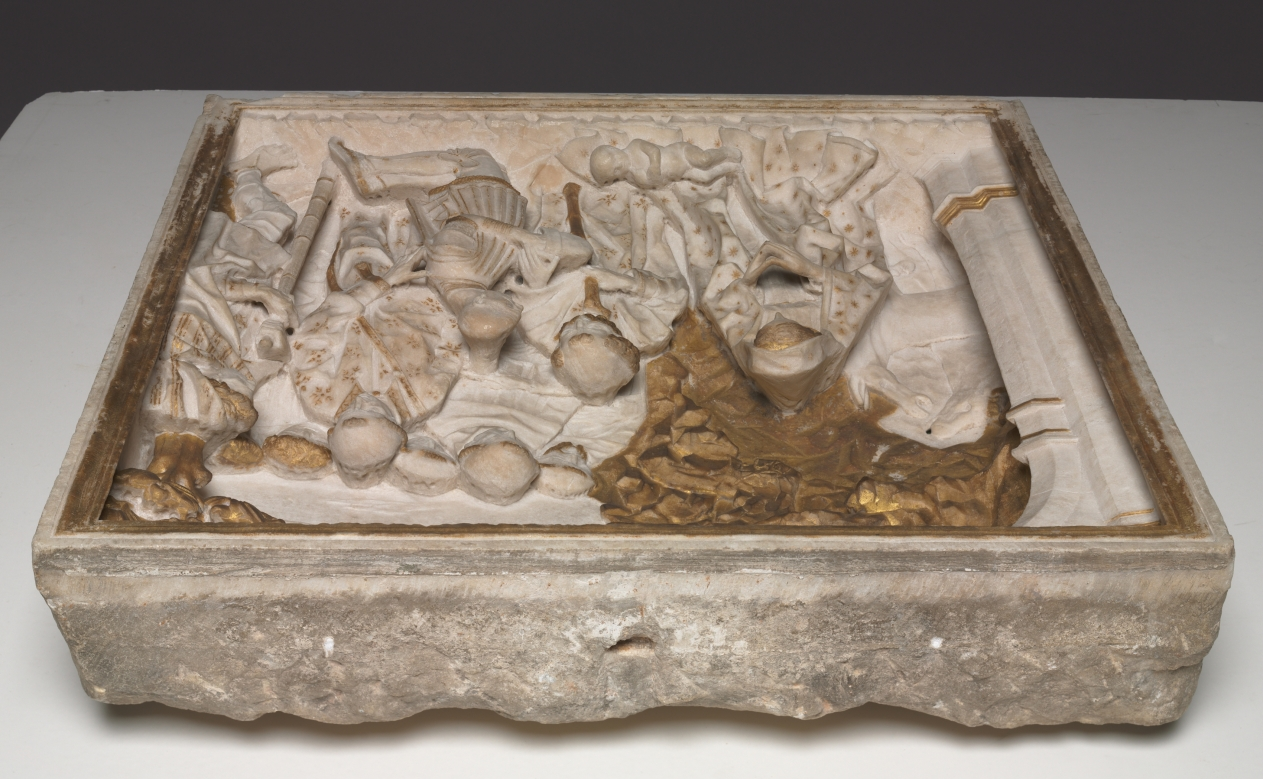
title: Pier Francesco Visconti, Court of Saliceto, Adoring the Christ Child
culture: Italy, Milan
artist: workshop of Benedetto Briosco (Italian, c. 1460–after 1514)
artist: and Tomaso Cazzaniga (Italian)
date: shortly after 1484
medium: marble with gilding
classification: Sculpture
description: This relief formed part of a public funerary monument in the church of Santa Maria del Carmine in Milan. The military leader and diplomat humbly kneels in profile before the infant Christ in a naturalistic setting, drawing attention to the Holy Family’s humanity and the deceased man’s reverence.